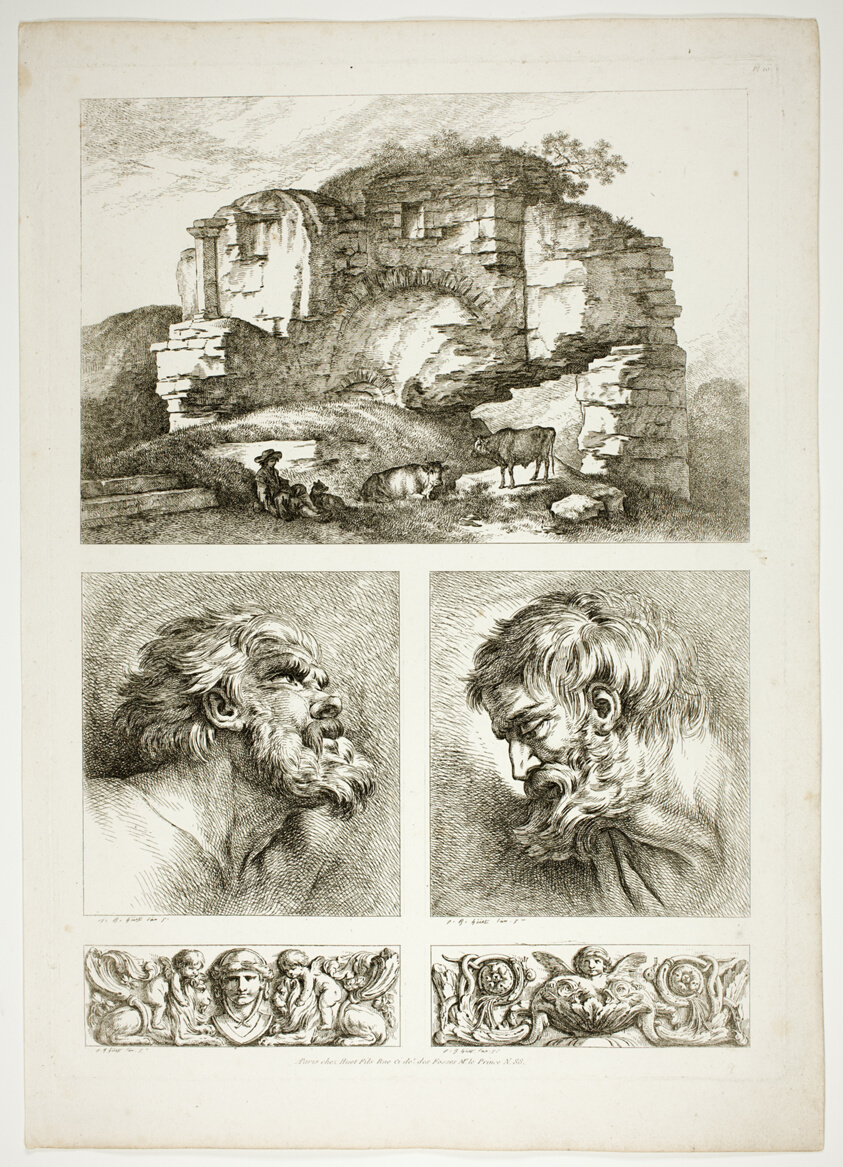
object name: Print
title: Plate Ten of 38 from Oeuvres de J. B. Huet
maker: Jean Baptiste Huet (French, 1745-1811)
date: 1796–99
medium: Etching on paper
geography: France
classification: etching; print; prints and drawing